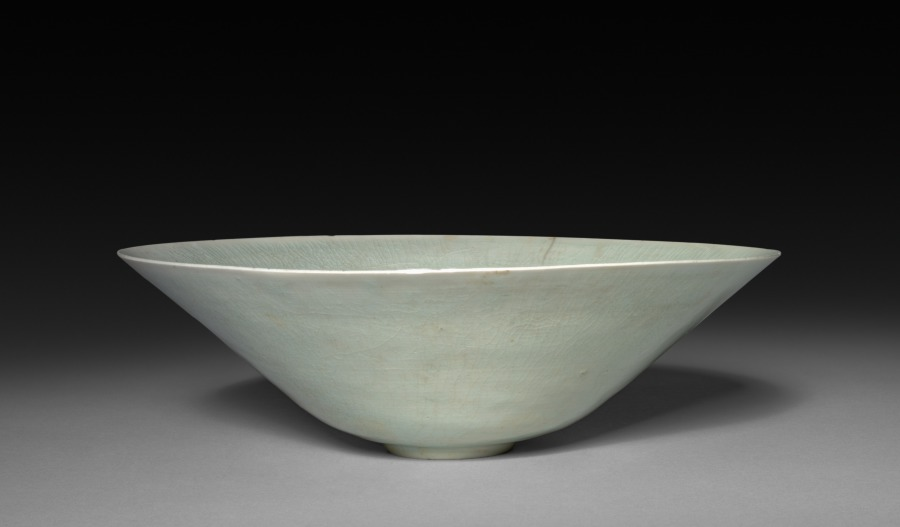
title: Coniform Bowl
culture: China, Song dynasty (960-1279)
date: 960–1279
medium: White porcelain, Yingqing ware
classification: Ceramic